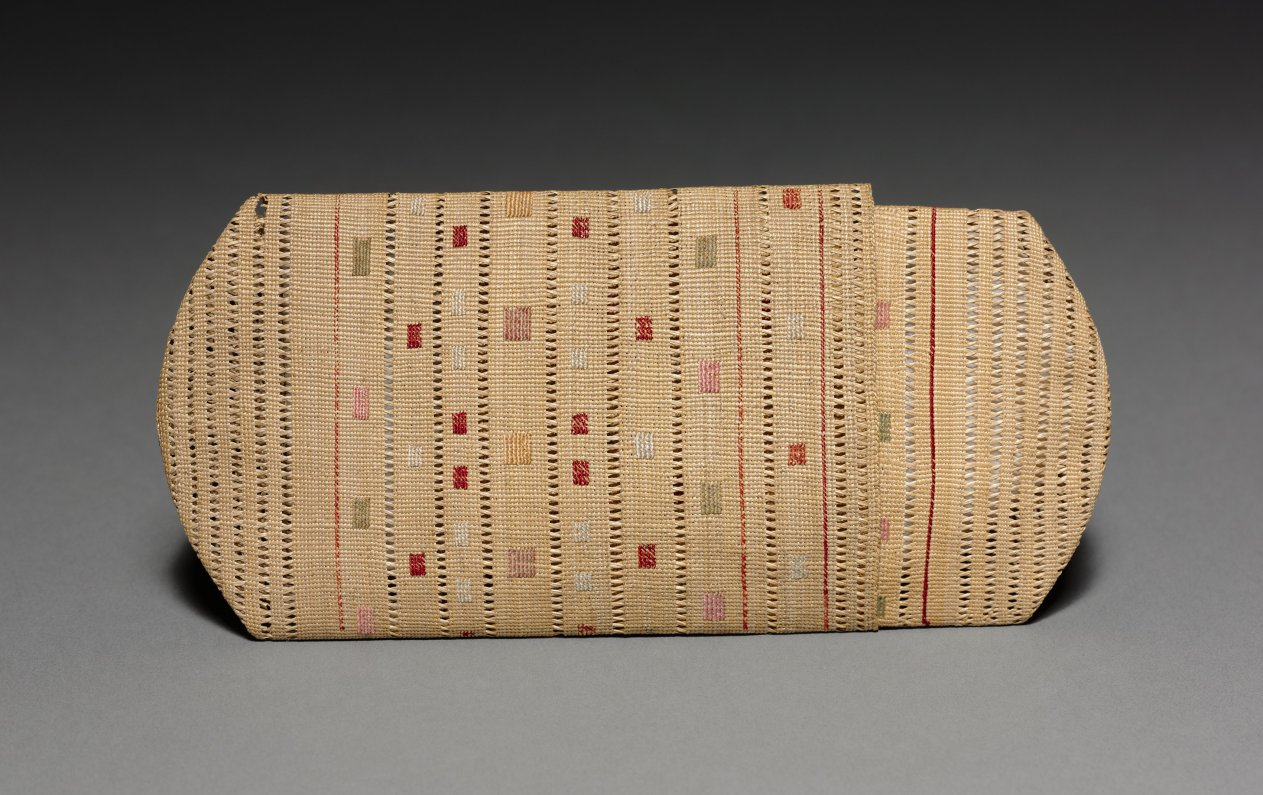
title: Cigarette or Needle Case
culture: Arctic, Aleut, Attu, Post-Contact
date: c 1875– 1917 (source unknown)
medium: plain twine, wild rye grass with crossed openwork, patterned twined start, intersecting layered spokes, and plaited finish; silk embroidery (catalogue card)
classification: Basketry